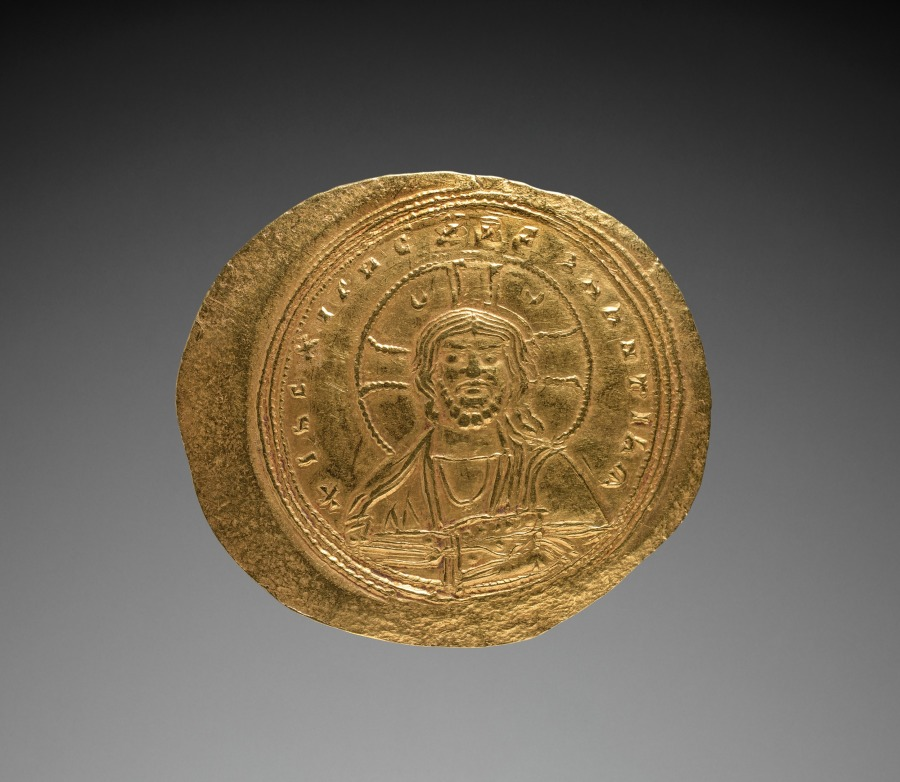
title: Nomisma with Constantine IX Monomachus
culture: Byzantium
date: 1042–1055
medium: gold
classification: Coins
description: The vast number of surviving Byzantine coins attests to the level of trade across the empire. Controlled and supervised by the emperor, the producers of coins took care to represent his authority and reflect his stature. Talented artists were recruited to engrave the dies (molds) used for the striking of coins. Emperors increasingly came to include their heirs and co-emperors on their coinage, as well as other family members or even earlier rulers. Coins were recognized, then as now, as small, portable works of art. With their inscriptions and images, Byzantine coins provide valuable documentation of historical events and a record of the physical appearance of the emperors. The solidus is the basic gold coin of 24 karats; the tremissis, a gold coin of one-third the weight and value of the solidus; and the nomisma, which in the 10th century replaced the solidus as the standard gold coin.